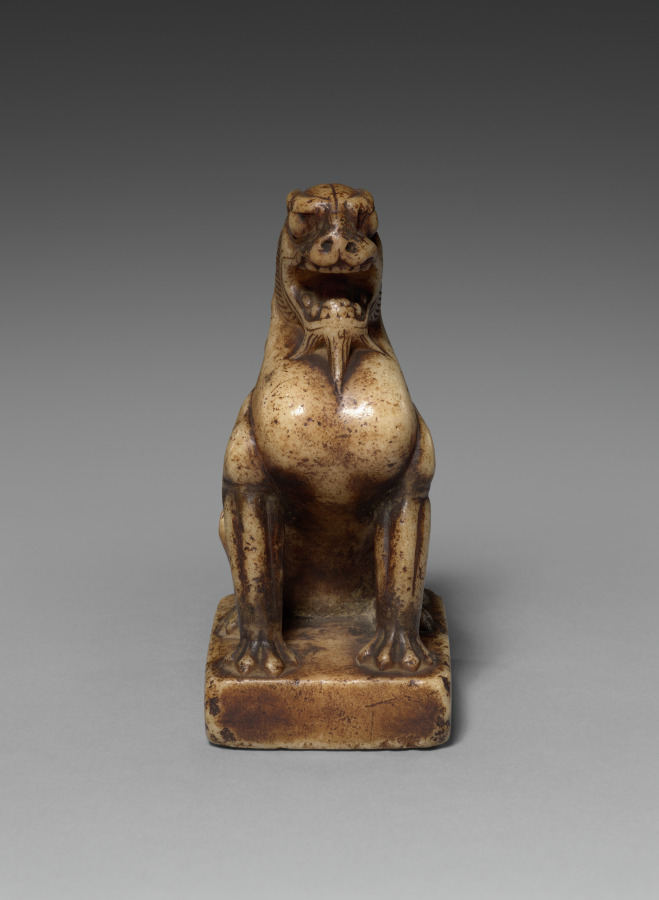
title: Lion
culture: China, Tang dynasty (618-907)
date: 618–907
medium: marble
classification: Sculpture